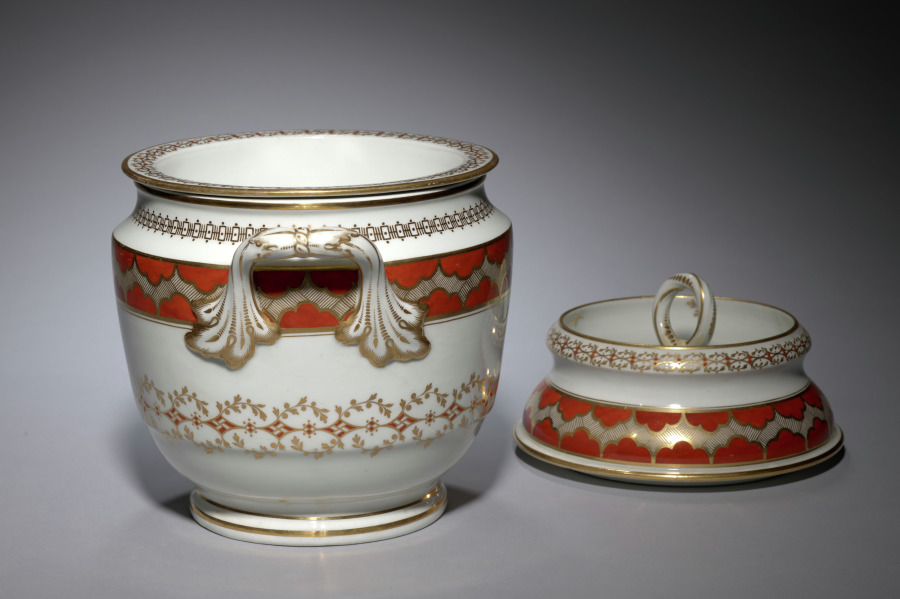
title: Ice Pail (2 of 2)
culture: England, late 18th-early 19th Century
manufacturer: Flight & Barr (British)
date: c. 1792–1804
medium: porcelain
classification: Ceramic